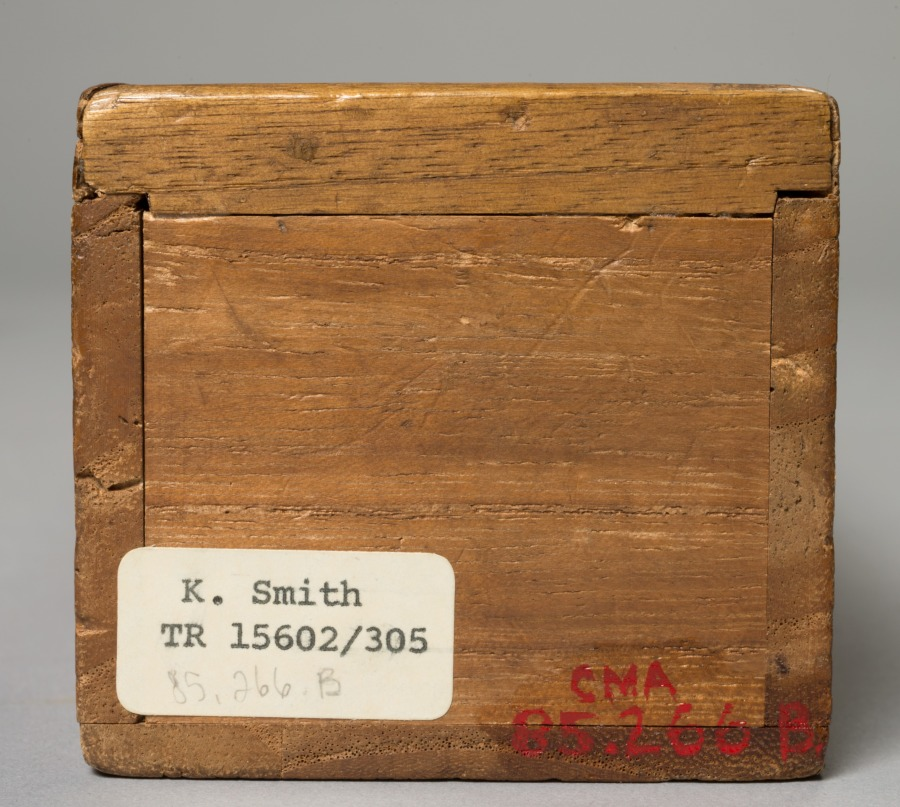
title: Pheasant and Grasses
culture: Japan, Edo period (1615–1868)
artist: attributed to Ogata Kōrin (Japanese, 1658–1716)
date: late 1600s–early 1700s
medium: hanging scroll; ink and color on paper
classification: Painting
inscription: two seals of artist, lower right.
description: Korin was a founder of the Rimpa (decorative) school of painting and was a keen observer of nature. The pheasant is often associated with autumn.